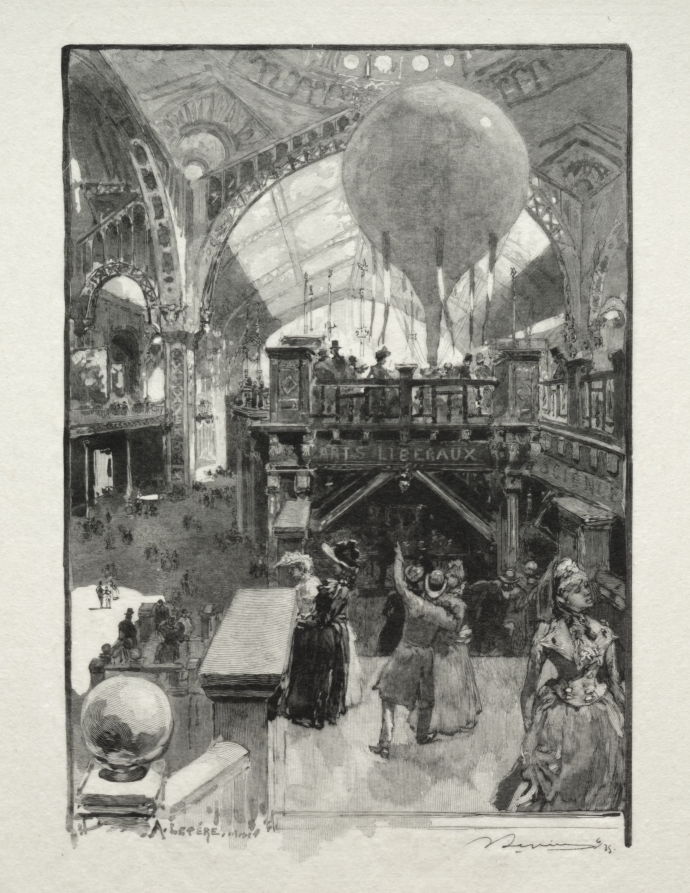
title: Le Palais des Arts Liberaux, Intèrieur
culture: France, 19th-20th century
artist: Auguste Louis Lepère (French, 1849–1918)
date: 1889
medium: wood engraving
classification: Print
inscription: On block, lower left: "A. Lepère del."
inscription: Written in ink: "(signed) 6/35"